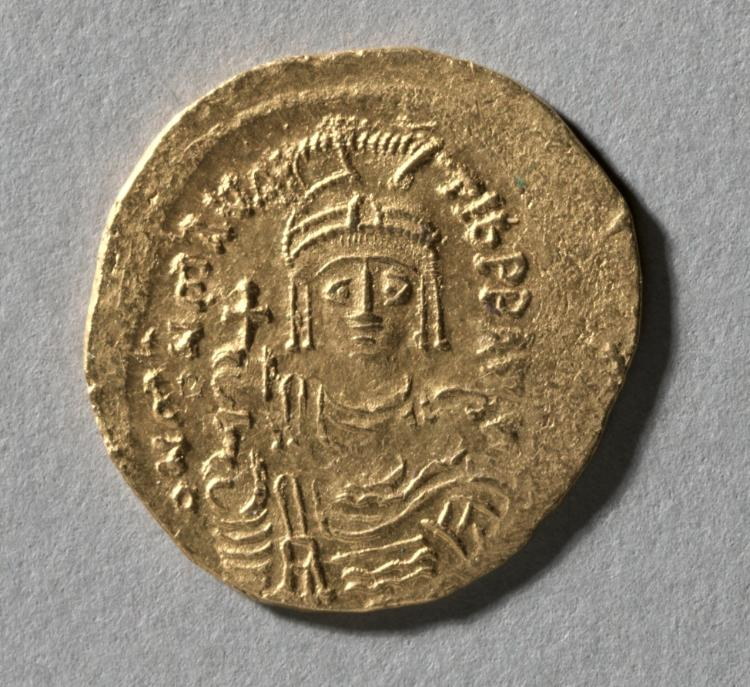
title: Solidus of Maurice Tiberius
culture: Byzantine, 6th-7th century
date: 583–602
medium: gold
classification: Coins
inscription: (Avers): DN MAVRC TIbPPAV[C] (Revers): VICTOR[I] AAVC[CI] and CONO[B]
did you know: The solidus coin was first made in AD 301 in Rome.